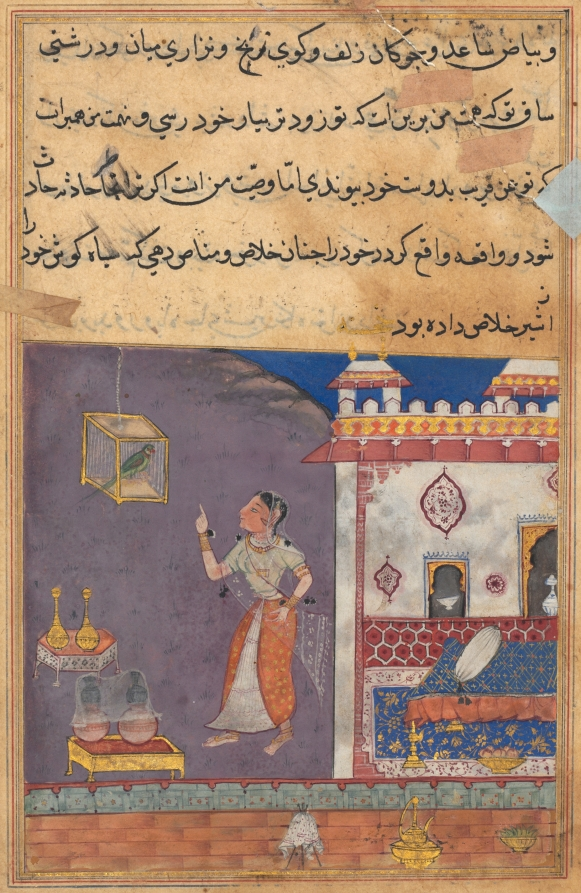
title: The Parrot Addresses Khujasta at the Beginning of the Twenty-ninth Night, from a Tuti-nama (Tales of a Parrot)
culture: Mughal India, court of Akbar (reigned 1556–1605)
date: c. 1560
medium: gum tempera, ink, and gold on paper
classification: Painting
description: Khujasta consults with the talking parrot Tuti before leaving to meet with her lover. The shrewd bird begins to tell her the story of a lynx who successfully saved himself from a lion. By the time the story ends, it is too late for Khujasta to leave for her rendezvous.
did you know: Two pieces of blue and white Chinese porcelain are visible in niches in Khujasta’s room.